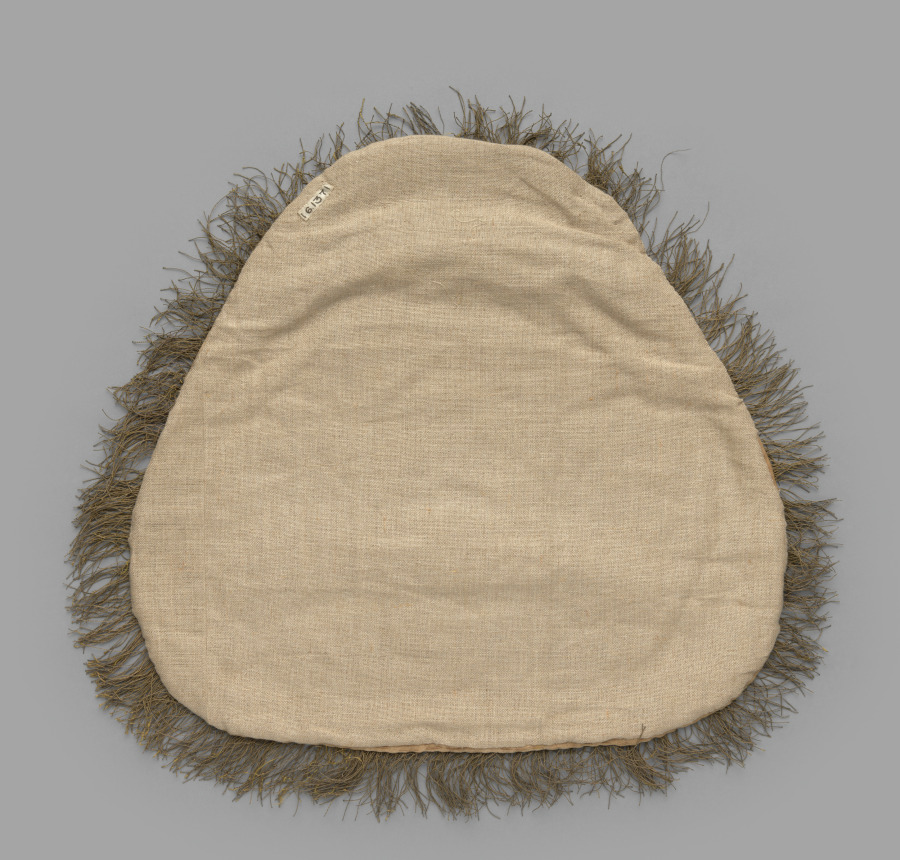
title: Gold Embroidered Pistol Cover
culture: Spain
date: 1700s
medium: embroidery; gold metallic thread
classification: Embroidery